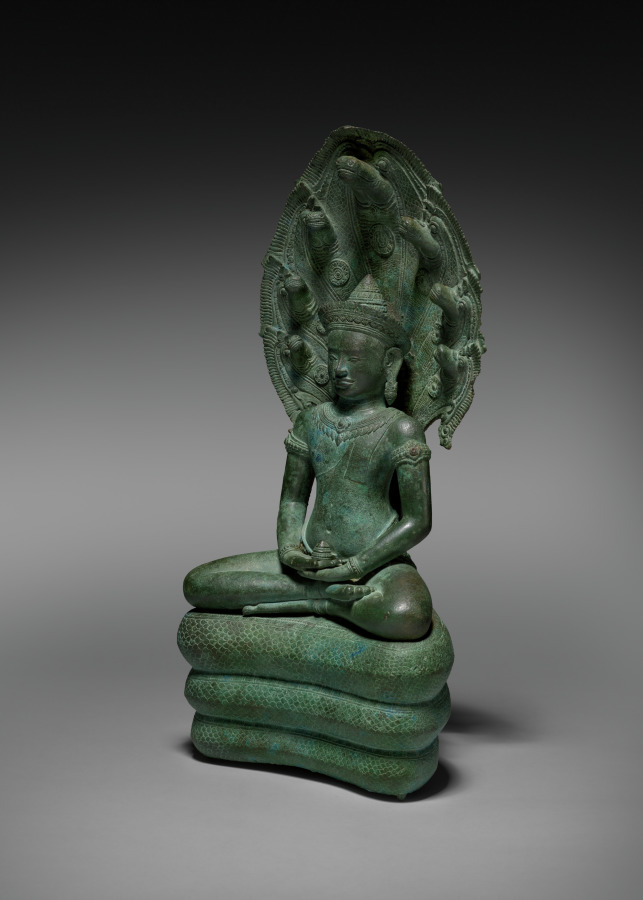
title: Naga-Enthroned Buddha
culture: Cambodia, Angkor, Angkor Wat Period, 12th century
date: 1100s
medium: bronze with traces of gilding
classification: Sculpture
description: Jayavarman VII, who built the great royal temple at Banteay Chhmar, linked himself with the image of the Buddha seated on a serpent, or naga, as the divine form under which he would be honored. During his reign, the naga-enthroned Buddha became a ubiquitous image for veneration, often set up together with Lokeshvara, who was associated with his father, and Prajnaparamita, the form under which his deceased mother was honored. Lokeshvara is the powerful enlightened being of compassion, while Prajnaparmita is the goddess who personifies wisdom. King Jayavarman VII, therefore, presented himself as the enlightened Buddha, the product of the union of Compassion and Wisdom, supported and glorified by the naga, which refers to the Khmer people. Images of the naga-enthroned Buddha have been found at Banteay Chhmar, both in architectural relief sculpture and as icons in the round. After the death of Jayavarman VII, followers of other forms of Buddhism (for example, Theravada) that became prevalent in Cambodia changed the meaning of the naga-enthroned Buddha and reinterpreted the image to refer to a scene from the historical Buddha’s life story in which a serpent protected him from a flood. The crowned and bejeweled aspect of this Buddha, though, indicates that it is another kind of transcendent figure. In his lap his hands are in a posture of meditation, holding what appears to be an offering of ceremonial rice referring to the hope that he will ensure the prosperity of the land.